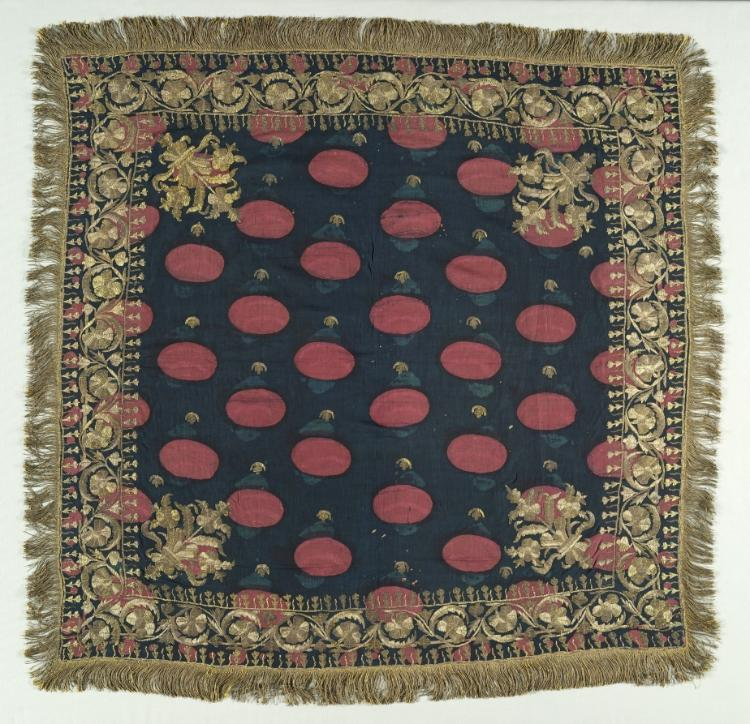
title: Embroidered Cover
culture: Turkey, 19th century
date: 19th century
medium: embroidery: gold filé, twisted around silk core, on cotton tabby ground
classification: Embroidery